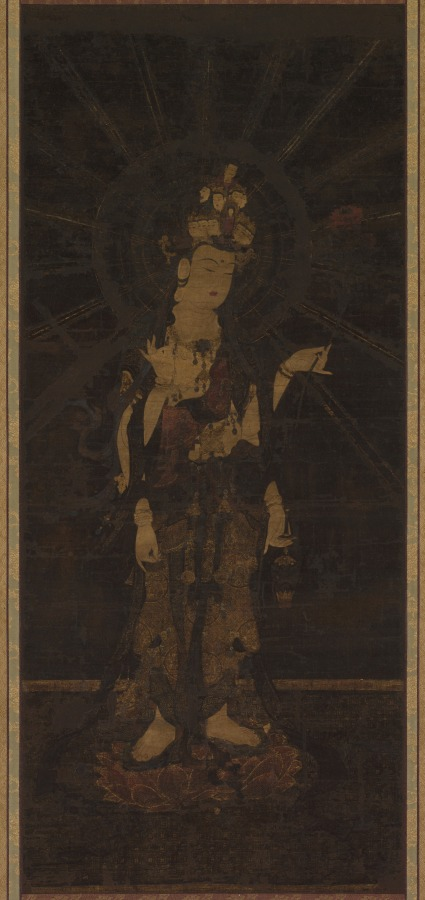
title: Eleven-Headed Kannon (Jūichimen Kannon)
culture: Japan, Kamakura period (1185–1333)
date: 1200s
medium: hanging scroll; color and cut gold (kirikane) on silk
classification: Painting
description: The Eleven-Headed Kannon, a deity of mercy and compassion in the Buddhist pantheon, was introduced into Japan in the 600s. By the 700s it had gained in popularity among an increasing number of believers, a condition it enjoyed until the end of the Kamakura period. The modest size and high quality of the materials apparent in this work indicate its use as a private devotional image. An earlier restoration of this painting included the use of an entire silk backing layer rather than silk patches with a paper backing. The tension that resulted between these two layers of silk, one old and the other recent, caused serious cracking to occur in the painting's surface. Moreover, the silk backing had been dyed a dark tone which did not enhance the appearance of the painting, although it did help hide damaged areas in the surface silk. Now two layers of backing paper support the painting, with its carefully fitted silk patches. These are toned slightly differently from the original surface values so that viewers can distinguish between the original and the modern restored areas. The original metal fittings have also been cleaned and reused. Other replacement fittings were deemed inappropriate for this early religious image and so new, specially designed ones are now in place.